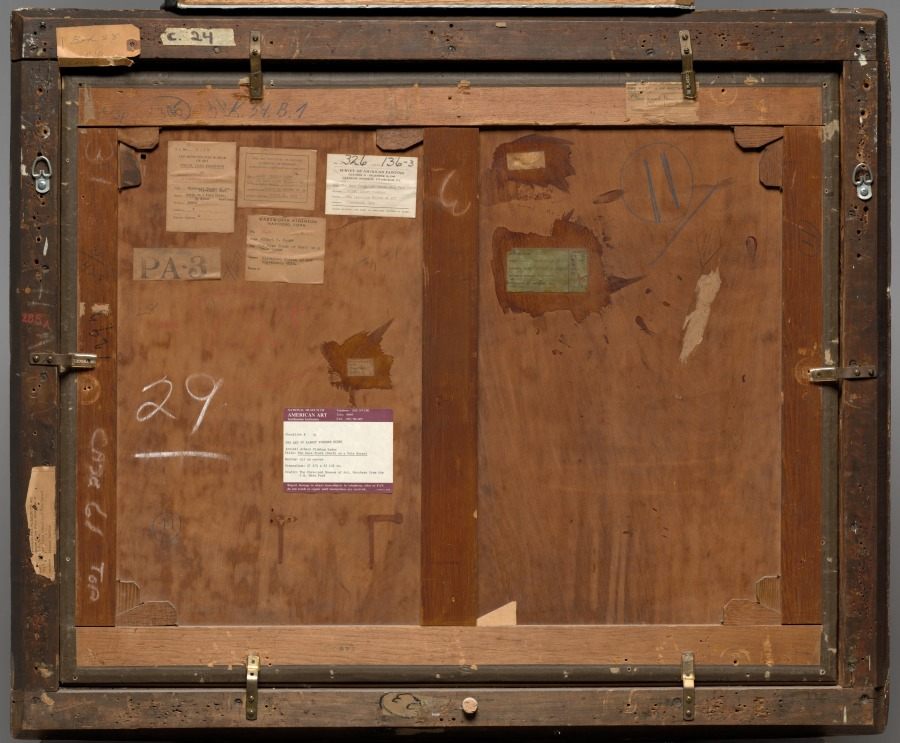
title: The Race Track (Death on a Pale Horse)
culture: America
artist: Albert Pinkham Ryder (American, 1847–1917)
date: c. 1896–1908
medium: oil on canvas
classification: Painting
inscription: Signed lower left: "A. P. Ryder"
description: Ryder’s subject was inspired by a horse race that took place in New York during 1888. One of the artist’s friends wagered $500 on the race and then died by suicide after the horse lost. Medieval symbolism infuses the composition: death appears as a skeleton on horseback holding a scythe with which he cuts down the living, while a snake—a sign of temptation and evil—slithers in the foreground. An intense man, Ryder worked on the painting for several years and was deeply reluctant to part with it.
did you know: Counterclockwise horse racing in the United States was not standardized until the 1920s.